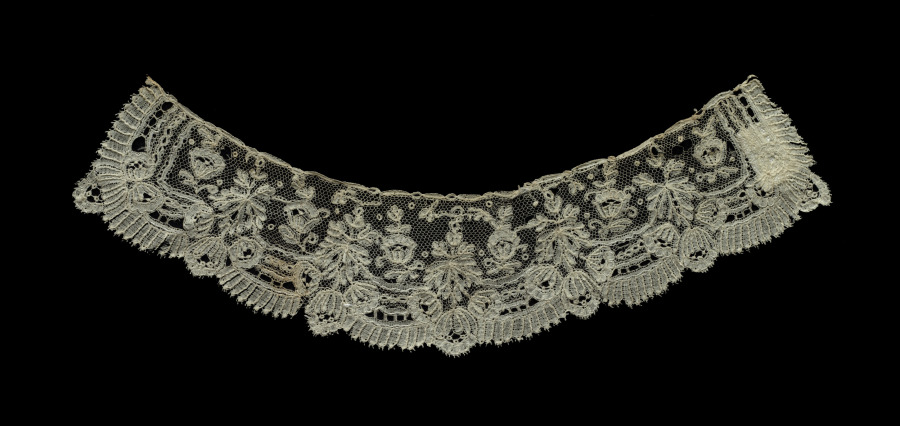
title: Lace Cuff (one of a pair)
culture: Probably Belgium, Brussels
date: 1800–1820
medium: Bobbin lace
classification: Lace